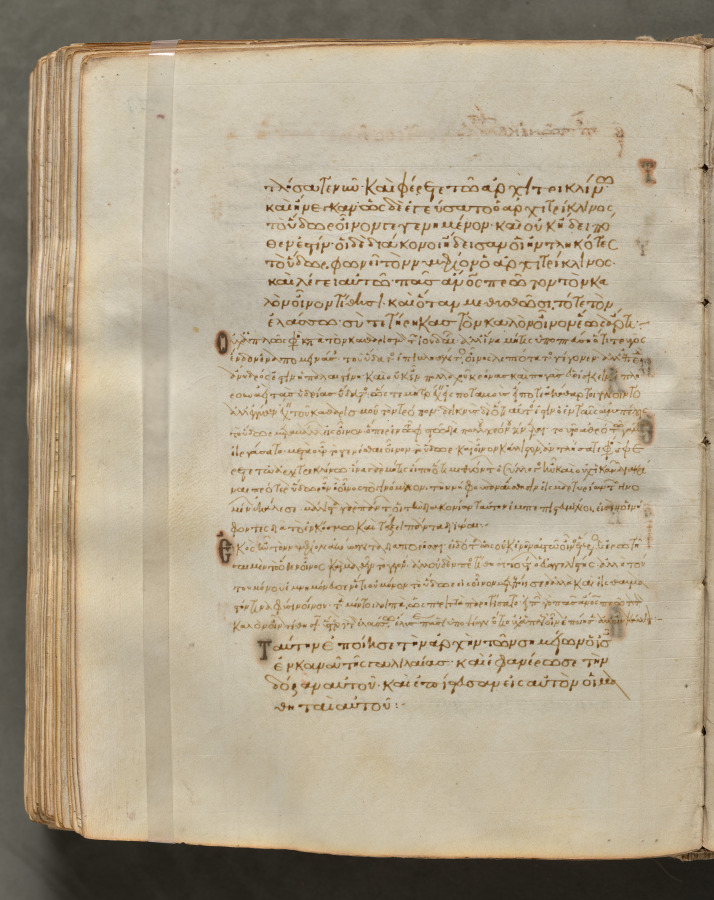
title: Text, folio 330 (verso), from a Gospel Book with Commentaries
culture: Byzantium, Constantinople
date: c. 1000–1100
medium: ink, tempera, and gold on vellum; leather binding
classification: Bound Volume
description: Each of the four gospels in this book opens on a page with brilliantly illuminated borders depicting the author of the text as well as birds—principally peacocks, symbols of the immortality of the soul—and fountains, representing the fountain of life and the salvation of the soul. This volume consists of 428 leaves with texts in Greek. Its level of sophistication suggests that it was probably written and decorated in a monastery in Constantinople.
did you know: Gospel books were carried in procession through Byzantine churches.